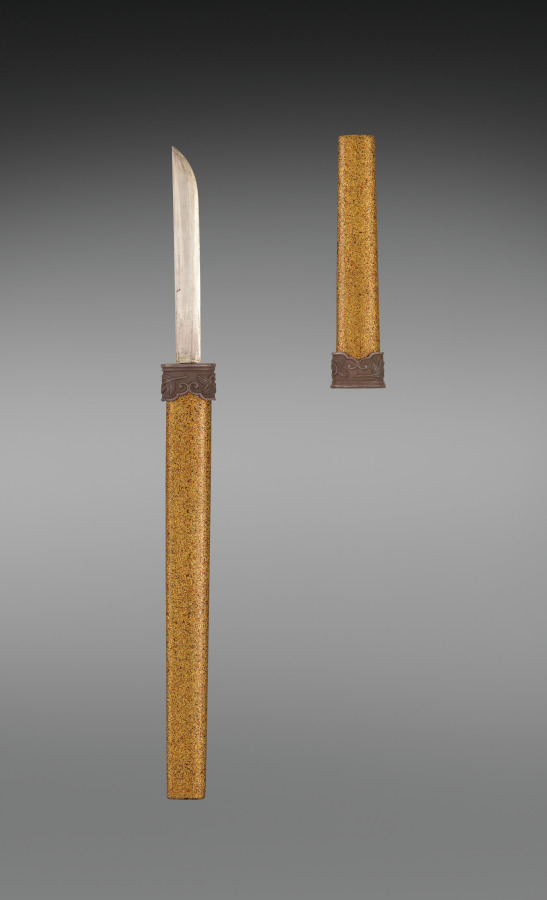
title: Writing Box (Suzuribako) with the “First Song” (Hatsune) Chapter from the Tale of Genji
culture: Japan, Meiji period (1868–1912)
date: early 1900s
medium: Lacquered wood with gold and silver sprinkled powder (maki-e), foil application (kirikane), and metal inlay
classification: Lacquer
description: The design of this box was inspired by an object in the 1639 lacquer wedding set of Chiyohime, the daughter of the shogun (ruler). Information about the set became available in the Meiji period, leading some lacquer artists to emulate its designs. This box features a scene from the chapter “First Song” (Hatsune) of the Tale of Genji, in which Prince Genji and his love Murasaki enjoy her garden. It incorporates the written characters for “first” (初, hatsu) and “sound” (音, ne), indicating the first song of the warbler in spring, associated with the new year—the water dropper for mixing the ink is in the shape of this bird.